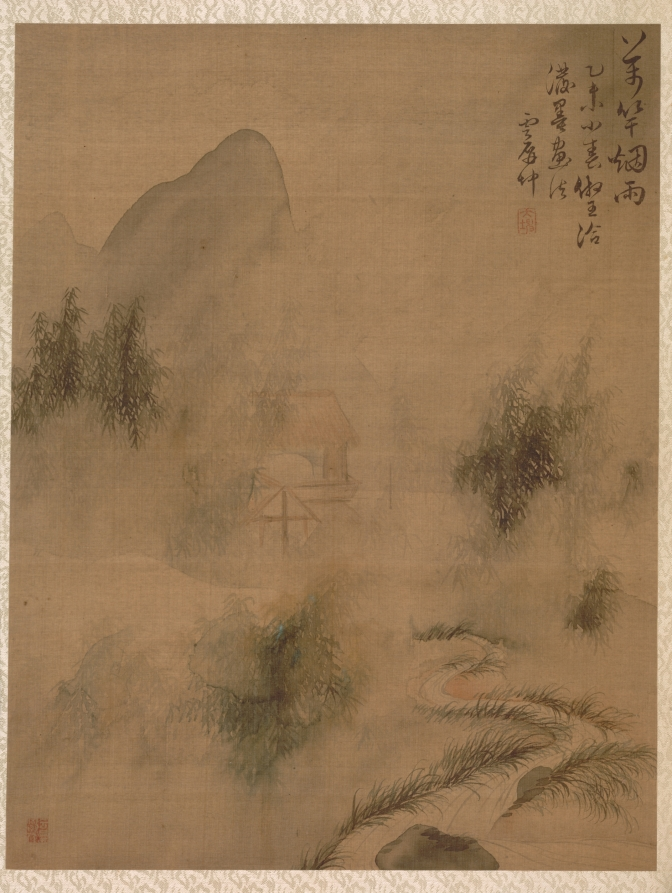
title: Ten Thousand Bamboos in the Mist and Rain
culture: China, Qing dynasty (1644-1911)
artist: Zhai Dakun (Chinese, d. 1804)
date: 1775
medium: album leaf; ink and color on silk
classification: Painting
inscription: Ten Thousand Bamboos in the Mist and Rain. In the tenth lunar month of the year yiwei (1775), in the ink-painting manner of Wang ___________. Yunping Kun Seal: r/r "Dakun"